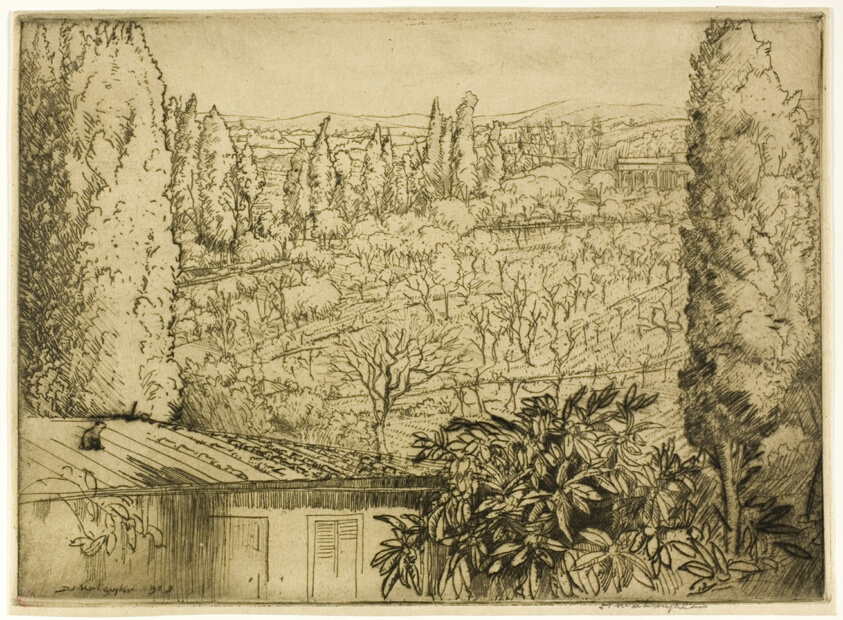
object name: Print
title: Tuscany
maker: Donald Shaw MacLaughlan (American, born Canada, 1876-1938)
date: 1909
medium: Etching in black on buff wove paper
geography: United States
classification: etching; print; prints and drawing